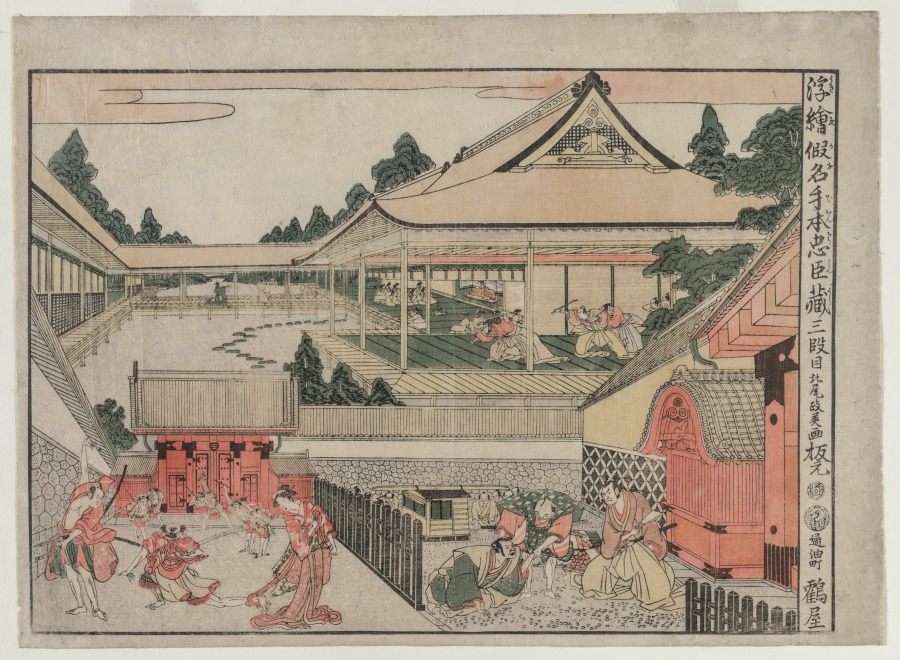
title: Chushingura: Act III (from the series Perspective Pictures for The Treasure House of Loyalty)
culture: Japan, Edo period (1615–1868)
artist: Kitao Masayoshi (Japanese, 1761–1824)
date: c. 1790s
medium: color woodblock print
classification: Print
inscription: Signature: Kitao Masayoshi ga Publisher: Tsuruya Kiemon (hammoto Toriaburacho Tsuruya, emblem) Censorship Seal: kiwame